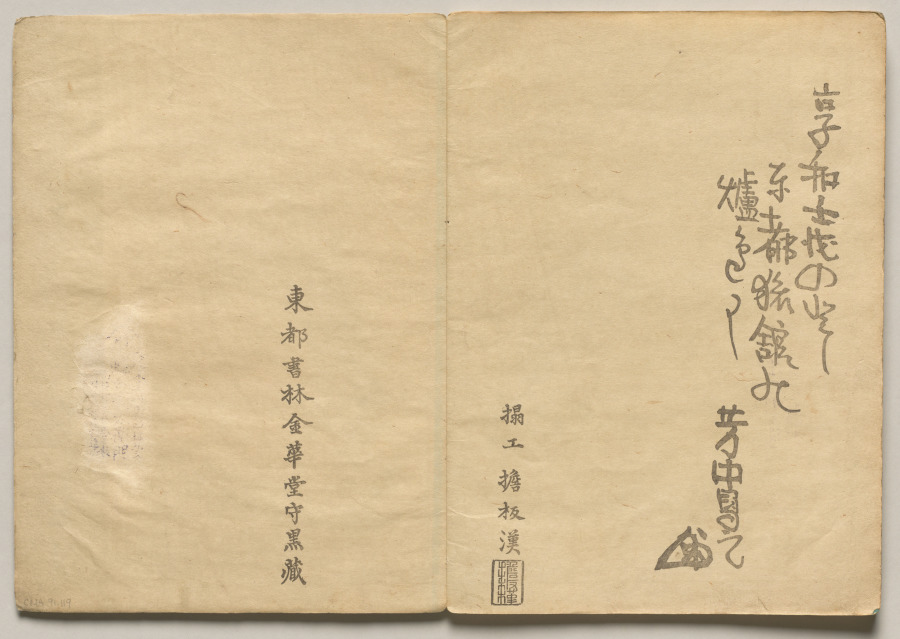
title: Scene from The Kōrin Picture Book (Volume 1)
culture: Japan, Edo period (1615–1868)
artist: Nakamura Hōchū (Japanese, d. 1819)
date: 1800s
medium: color woodblock printed book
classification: Bound Volume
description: Ogata Korin (1658-1716) was one of the most admired artists of Rimpa, or "decorative school painting." These books by the charming later-generation Rimpa artist Hochu record Korin's inventive designs.